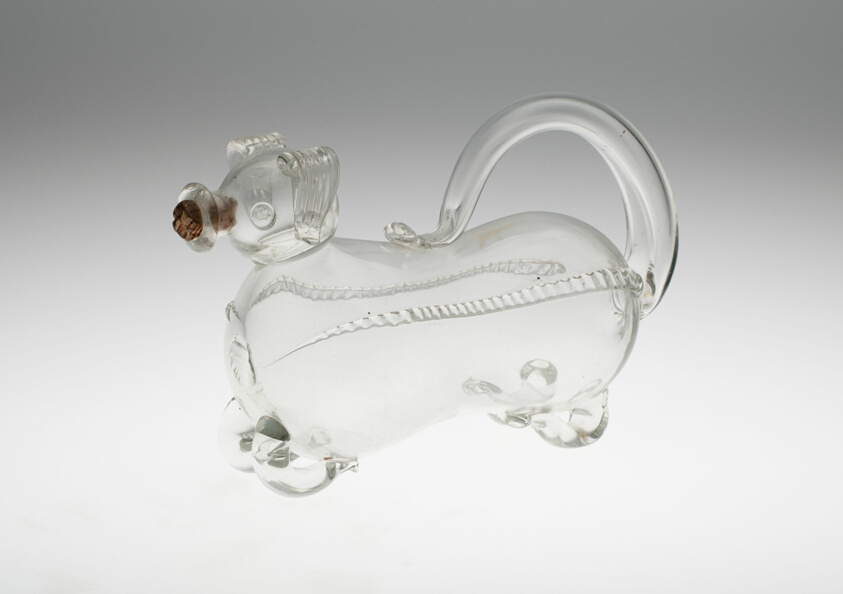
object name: Glass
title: Bottle in the Form of a Pig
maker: Sweden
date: 19th century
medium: Glass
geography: Sweden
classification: glass; european decorative arts